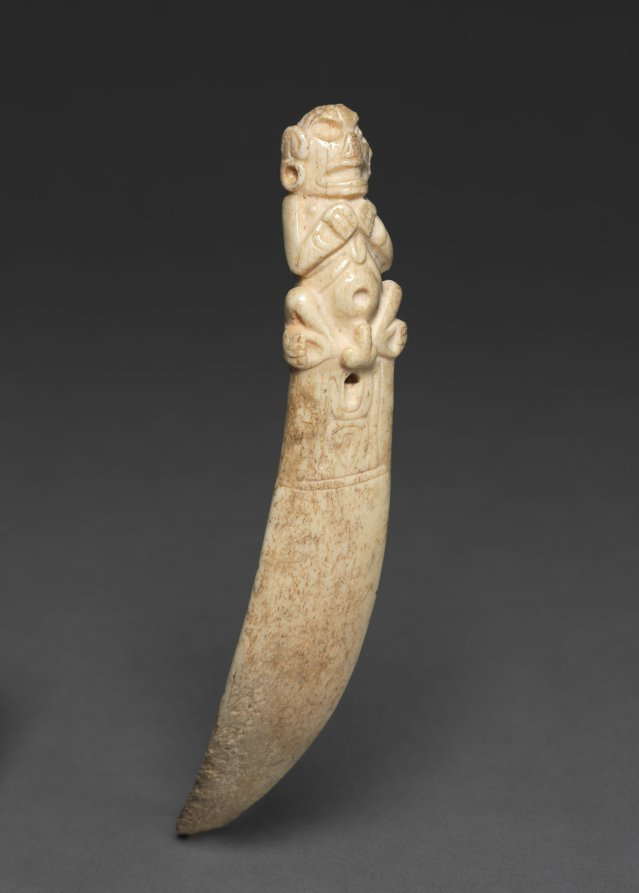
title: Spatula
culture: Caribbean, Greater Antilles, Taino, 10th-15th century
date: 900–1492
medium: manatee bone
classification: Sculpture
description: In 1492, when Christopher Columbus sailed into the Caribbean, the islands of Cuba, Hispaniola (Haiti and the Dominican Republic), Jamaica and Puerto Rico were inhabited by the Taino people. Taino religious ceremonies often included the snuffing of hallucinogenic herbs to alter the consciousness and facilitate contact with the spirit world. Carved spatulas were used to blend the powdered herbs. After purifying the body through purging the stomach, the snuff was inhaled into both nostrils.